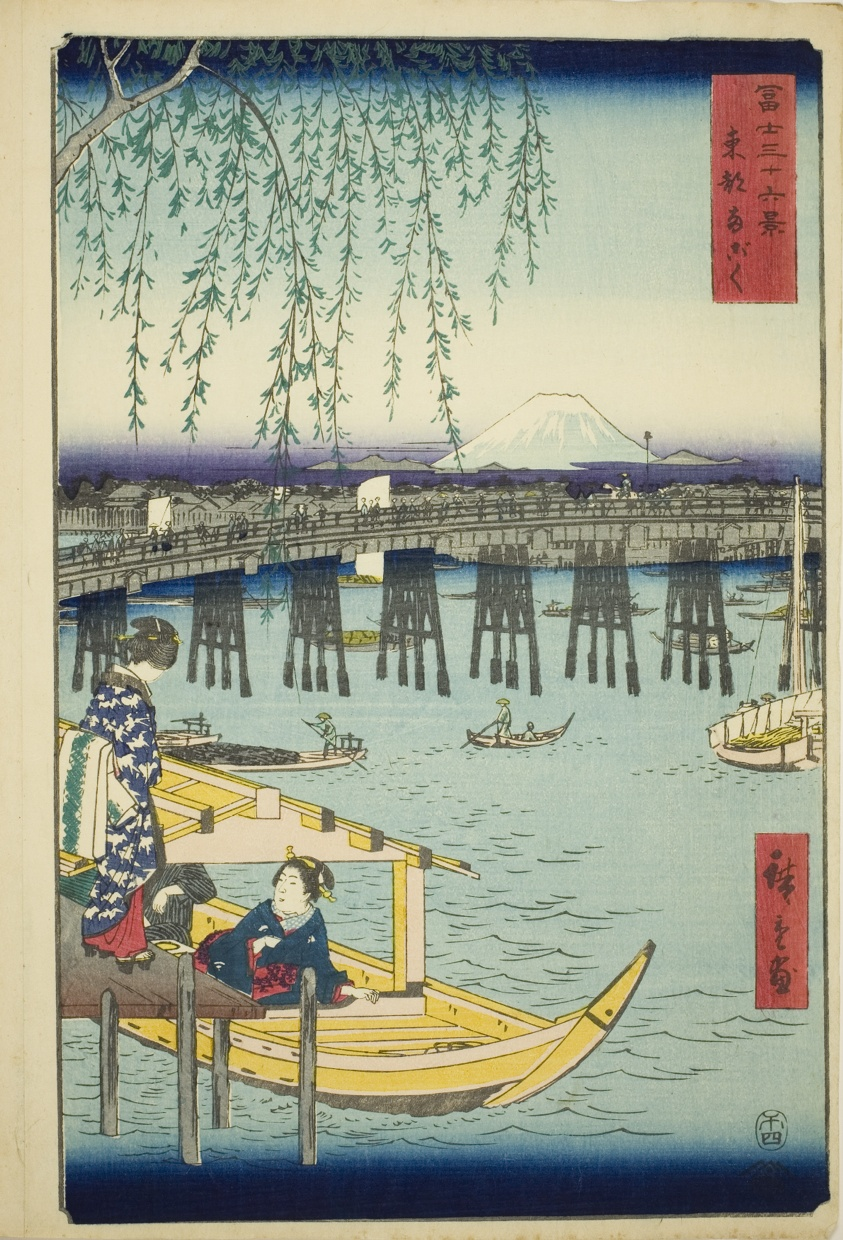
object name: Print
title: Ryogoku Bridge in the Eastern Capital (Toto Ryogoku), from the series "Thirty-six Views of Mount Fuji (Fuji sanjurokkei)"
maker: Utagawa Hiroshige 歌川 広重; Japanese, 1797-1858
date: 1858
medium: Color woodblock print; oban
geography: Japan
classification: print; asian art